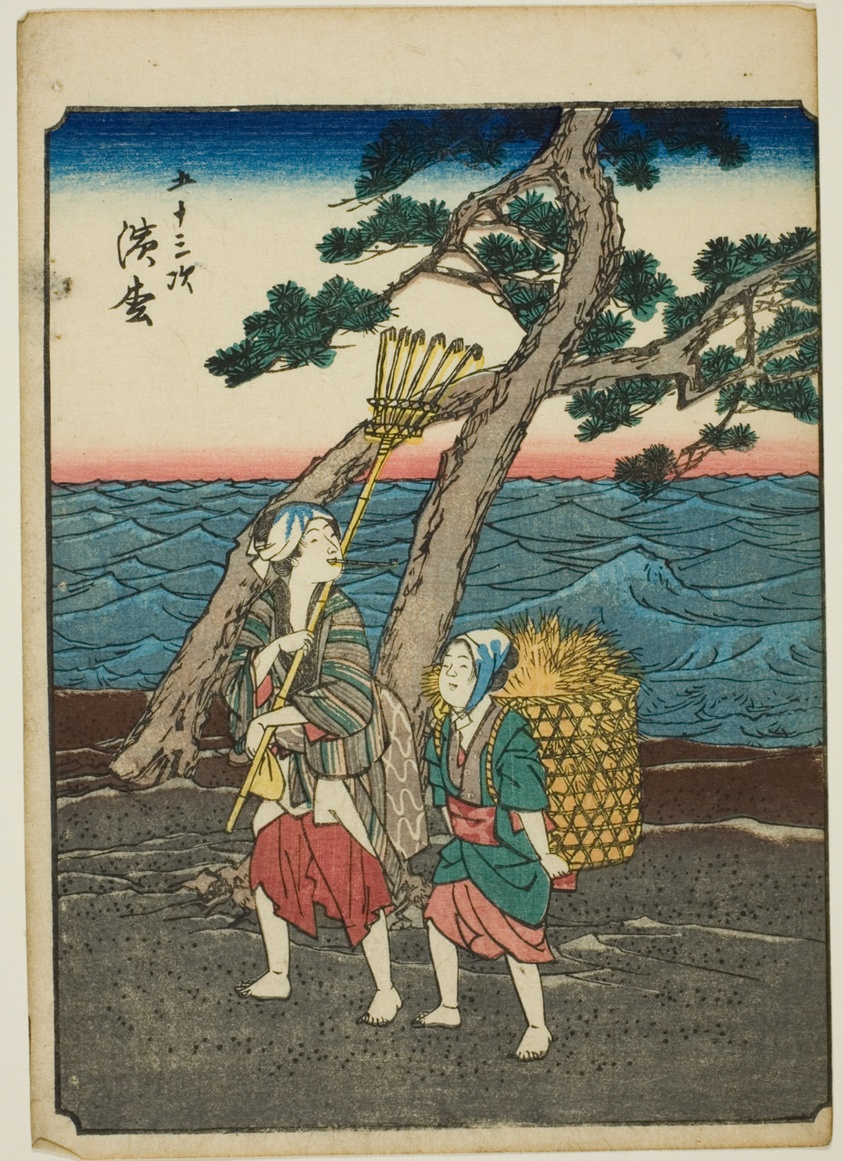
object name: Print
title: Hamamatsu, from the series "Fifty-three Stations [of the Tokaido] (Gojusan tsugi)," also known as the Figure Tokaido (Jinbutsu Tokaido)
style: Japanese (culture or style)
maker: Utagawa Hiroshige 歌川 広重; Japanese, 1797-1858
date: 1852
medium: Color woodblock print; chuban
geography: Japan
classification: woodblock print; print